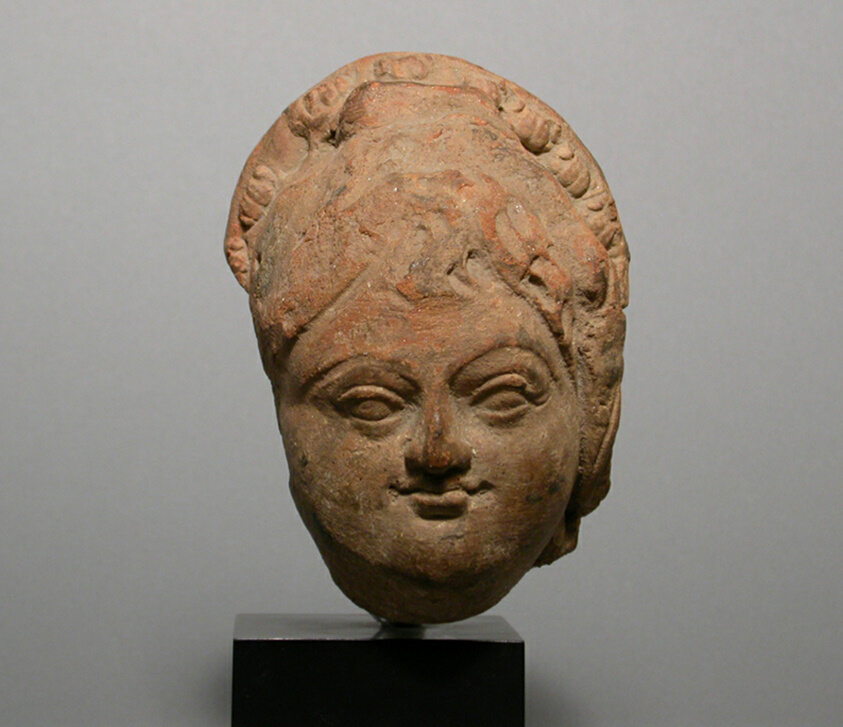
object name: Sculpture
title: Female Head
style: South Asian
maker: Pakistan or India; Ancient region of Gandhara, possibly Kashmir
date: 4th/6th century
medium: Terracotta with traces of red slip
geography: Gandhara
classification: earthenware; ceramics; sculpture; asian art